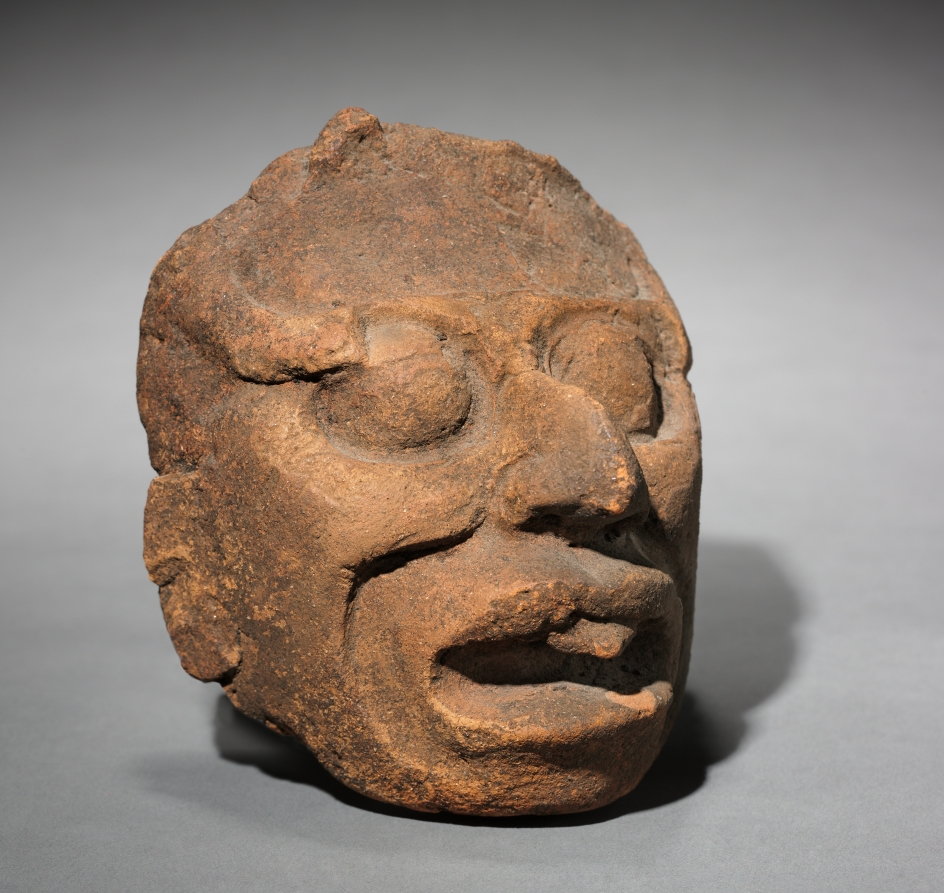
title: Face Fragment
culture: Mexico, Palenque region(?), Maya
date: 600–1000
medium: molded pottery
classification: Sculpture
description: This thick, heavy ceramic face fragment may come from an incensario (incense burner). Several features, including the tau- or T-shaped front teeth, suggest it represents a deity known today only as G1 due to difficulties in translating its Maya name, which is recorded in hieroglyphs. The deity’s meanings are equally elusive, though it seems to be associated with both the sun and water.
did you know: G1’s distinctive tooth was perhaps inspired by a 63 million-year-old fossilized shark tooth.